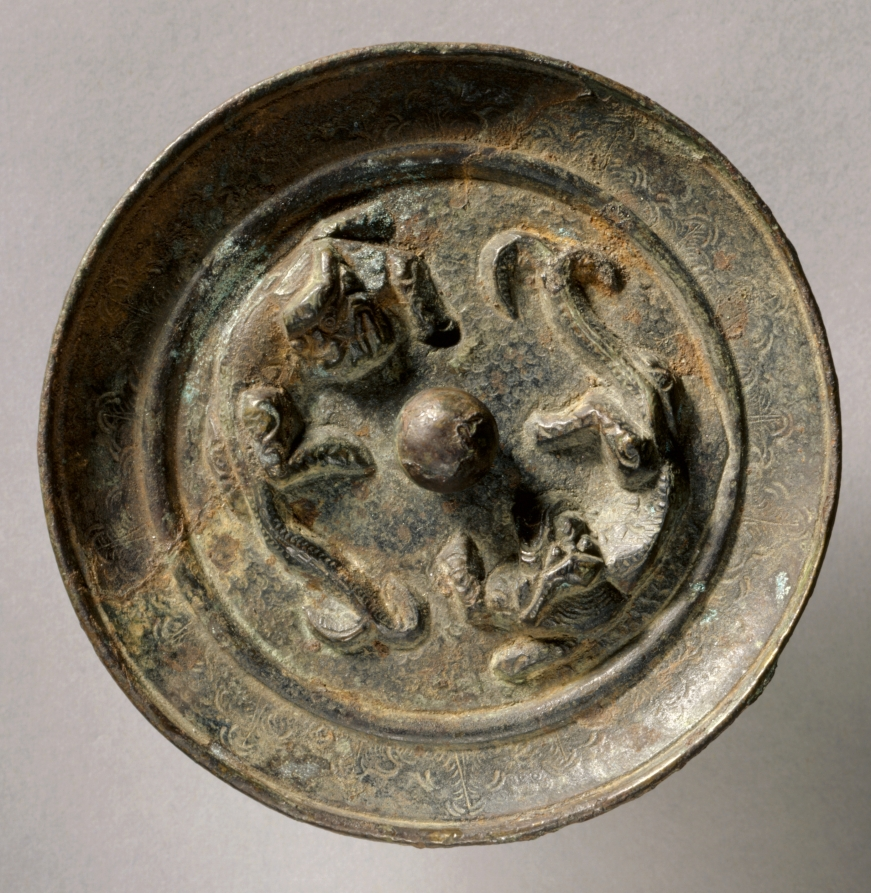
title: Mirror with Dragon Design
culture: China, Qing dynasty (1644-1911)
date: 1700–1911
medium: bronze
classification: Metalwork